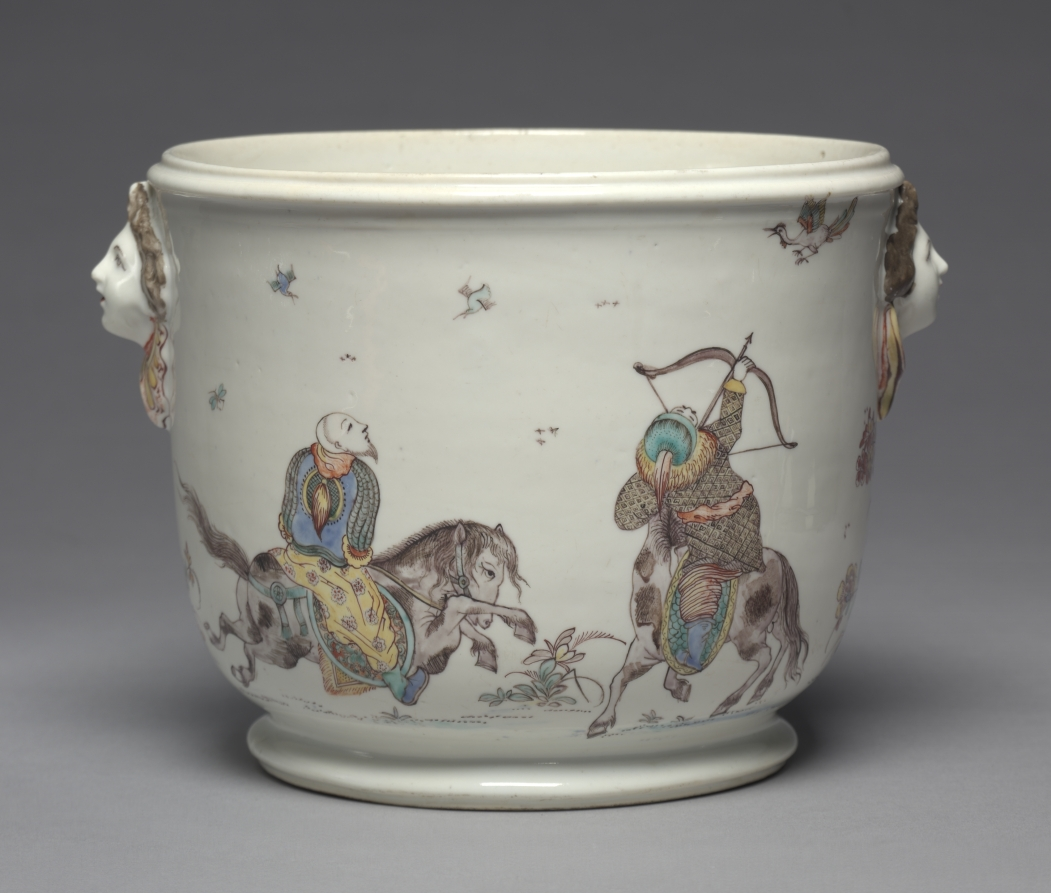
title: Bottle Cooler (seau a bouteille)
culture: France, Mennecy, 18th century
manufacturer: Mennecy- Villeroy Factory (French)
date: c. 1755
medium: Tin-glazed soft-paste porcelain with enamel decoration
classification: Ceramic